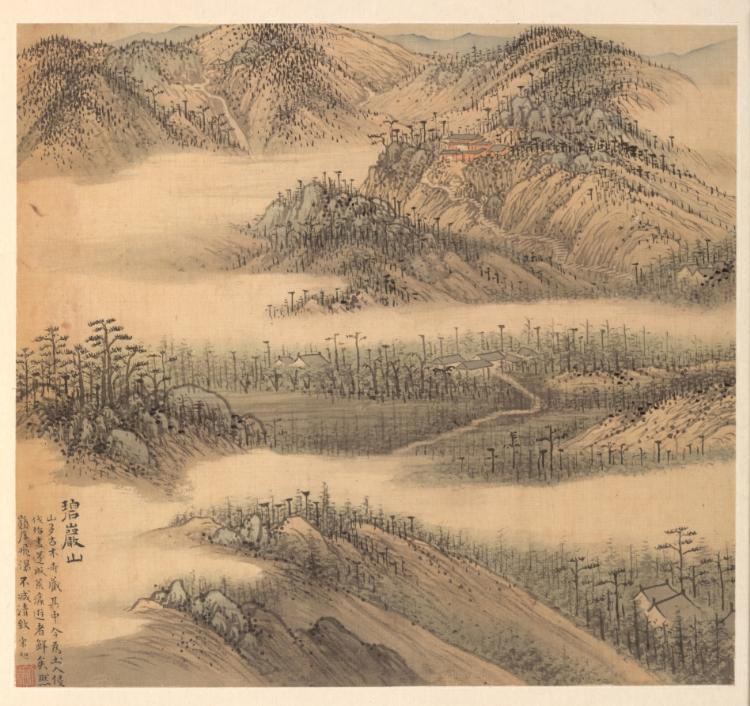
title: Mt. Biyan (Green Cliff)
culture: China, Jiaxing, Ming dynasty (1368–1644)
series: Eighteen Views of Huzhou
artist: Song Xu (Chinese, 1525-c. 1606)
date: c. 1588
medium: Album leaf; ink and color on silk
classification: Painting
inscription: 碧巖山：山多古木，寺藏其中。今為人侵伐殆盡，遂成荒廢，遊者鮮矣。然嶺崖飛瀑，不減清致。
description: This album of landscape paintings depicts the famous scenic areas located in and around the city of Wuxing in southeastern China. These places were all known for their natural beauty, but in addition, a number were distinguished by their links to eminent historical figures and events. The artist, Song Xu, was not a native of Wuxing, but must have visited it when he accepted the commission, for he carefully depicted all eighteen views and wrote comments on each of them. Song's gazetteer-like notation on this leaf reads: Green Cliff Mountain used to have a primeval forest, with a temple hidden within it. Now, those primeval forests have been wantonly and completely cut down. Consequently, with its devastated look, few travelers are coming. Still, with its peaks, cliffs, waterfall, there is no lack of scenic beauty.